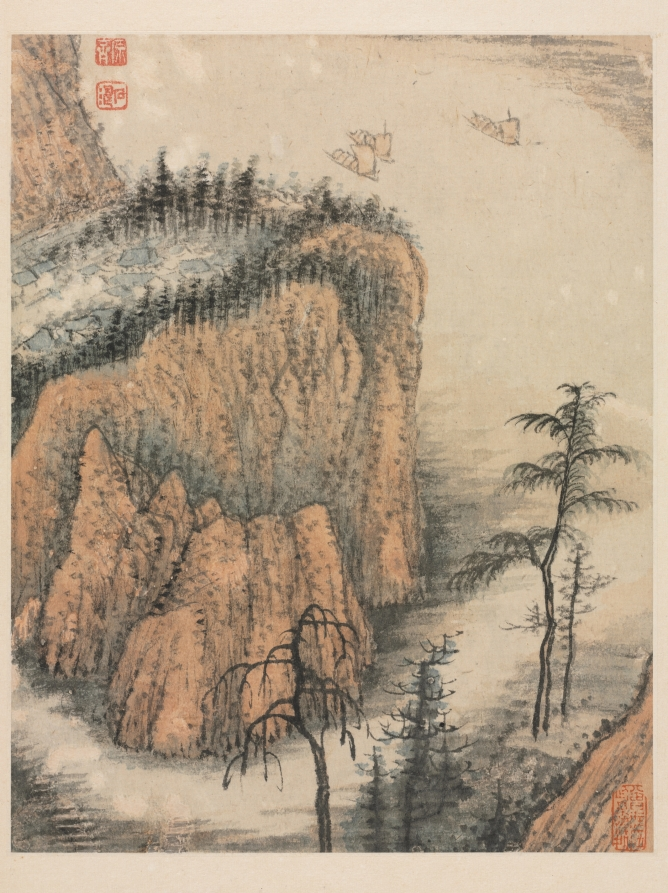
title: Reminiscences of Qinhuai River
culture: China, Qing dynasty (1644-1911)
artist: Shitao (Chinese, 1642–1707)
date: 1642–1707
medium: album leaf, ink and color on Song paper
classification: Painting